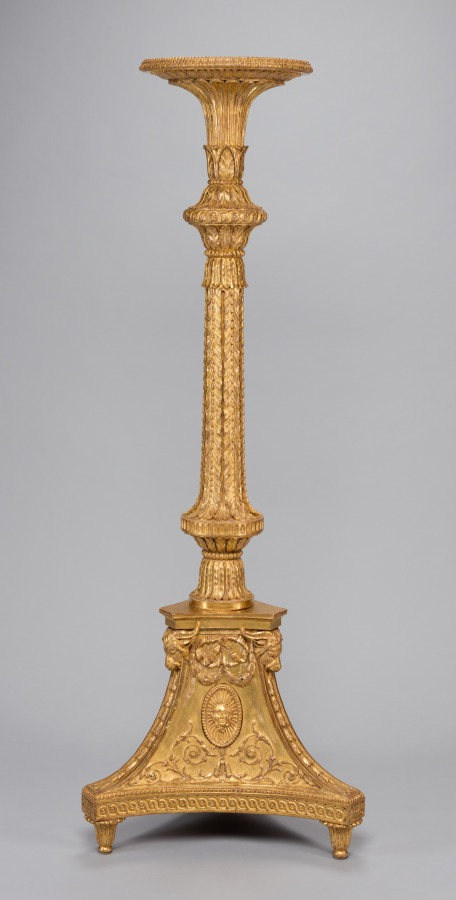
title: Candle Stand (torchère) (2 of 2)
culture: England, 18th century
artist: Thomas Chippendale (British, 1718–1779)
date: c. 1773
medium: Gilt-wood, gesso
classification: Furniture and woodwork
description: This gilded candle stand was made by Thomas Chippendale, the most renowned cabinetmaker in eighteenth-century London, for the grand drawing room of Brocket Hall, a large country house in Hertfordshire, England. With finely carved acanthus leaves, swags, fluting, and oval masks depicting the Roman goddess Diana, this candle stand exhibits Chippendale’s masterful understanding of neoclassical proportion, scale, and ornament. His landmark book of furniture designs, The Gentleman and Cabinet-Maker’s Director (first published in 1754), was highly admired as a source of inspiration by cabinetmakers and architects around England as well as in Europe and America.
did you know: Candle stands usually held silver or crystal candelabra that were lit for evening entertainment.